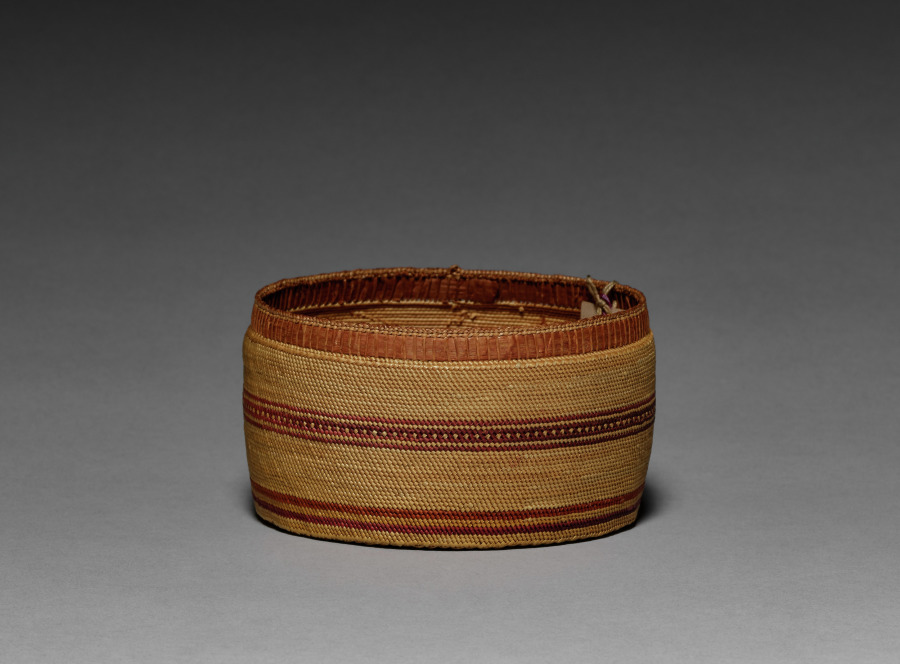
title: Bowl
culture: Northwest Coast, Makah, late 19th century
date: c 1900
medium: Cedar bark, deer grass; wrapped twining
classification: Basketry